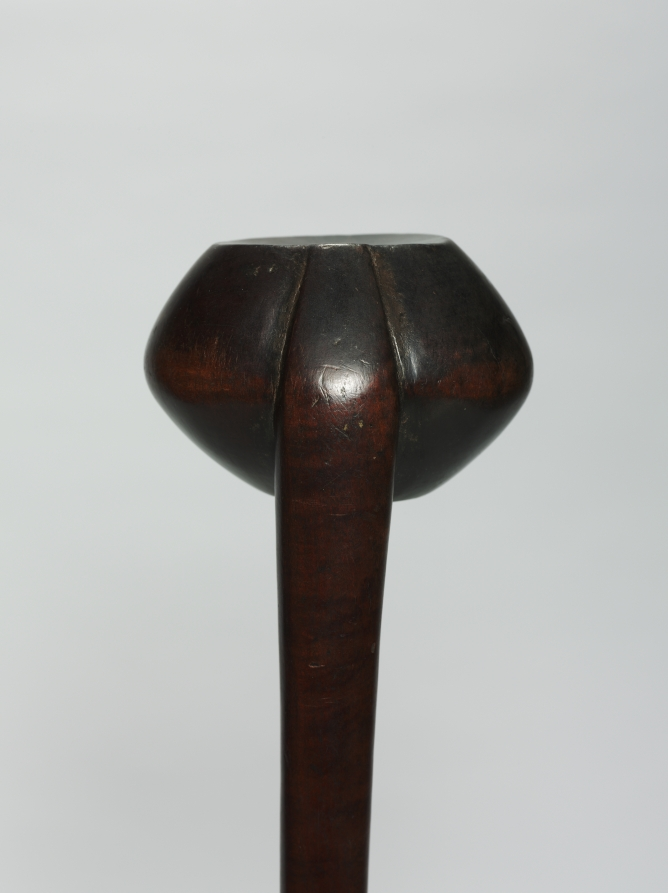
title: Club (Knobkerrie)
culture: Southern Africa, South Africa, Northern Ngun-style or Zulu-style maker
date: late 1800s or early 1900s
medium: Wood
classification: Arms and Armor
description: Relatively short sticks historically used for hunting and fighting are customarily called knobkerries. A combination of Afrikaans and Shona words, the name refers to the characteristic spherical knob of wood (knop) or head atop a cylindrical shaft (kirri). The knobs on these were carved into a tight whorl and a compressed sphere with a central rib. Even though their basic shapes were derived from real weapons, many of these precious objects were rarely if ever used as such. Highly personal, they instead functioned as ceremonial display items or regalia, symbolizing the masculinity and prowess of their owner.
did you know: The term knobkerrie refers to a characteristic spherical knob of wood or head atop a cylindrical shaft.